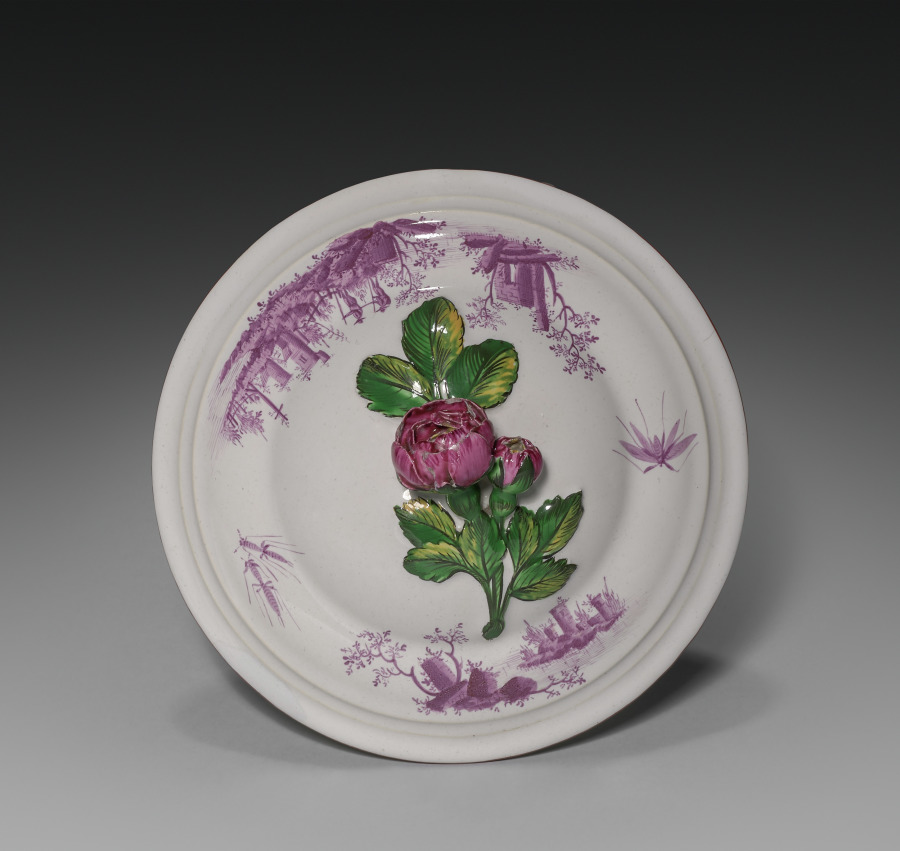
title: Cover for a Bowl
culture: France, 18th century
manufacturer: Saint-Clément Factory (French)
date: c. 1775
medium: tin-glazed earthenware (faience) with enamel decoration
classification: Ceramic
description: The faience factory at Saint-Clément in eastern France closely imitated the styles and techniques employed by the Hannong's at Strasbourg. The monochrome landscapes in red on this covered bowl demonstrate the influence of German, in this case Meissen, porcelain on the faience made in this part of France.